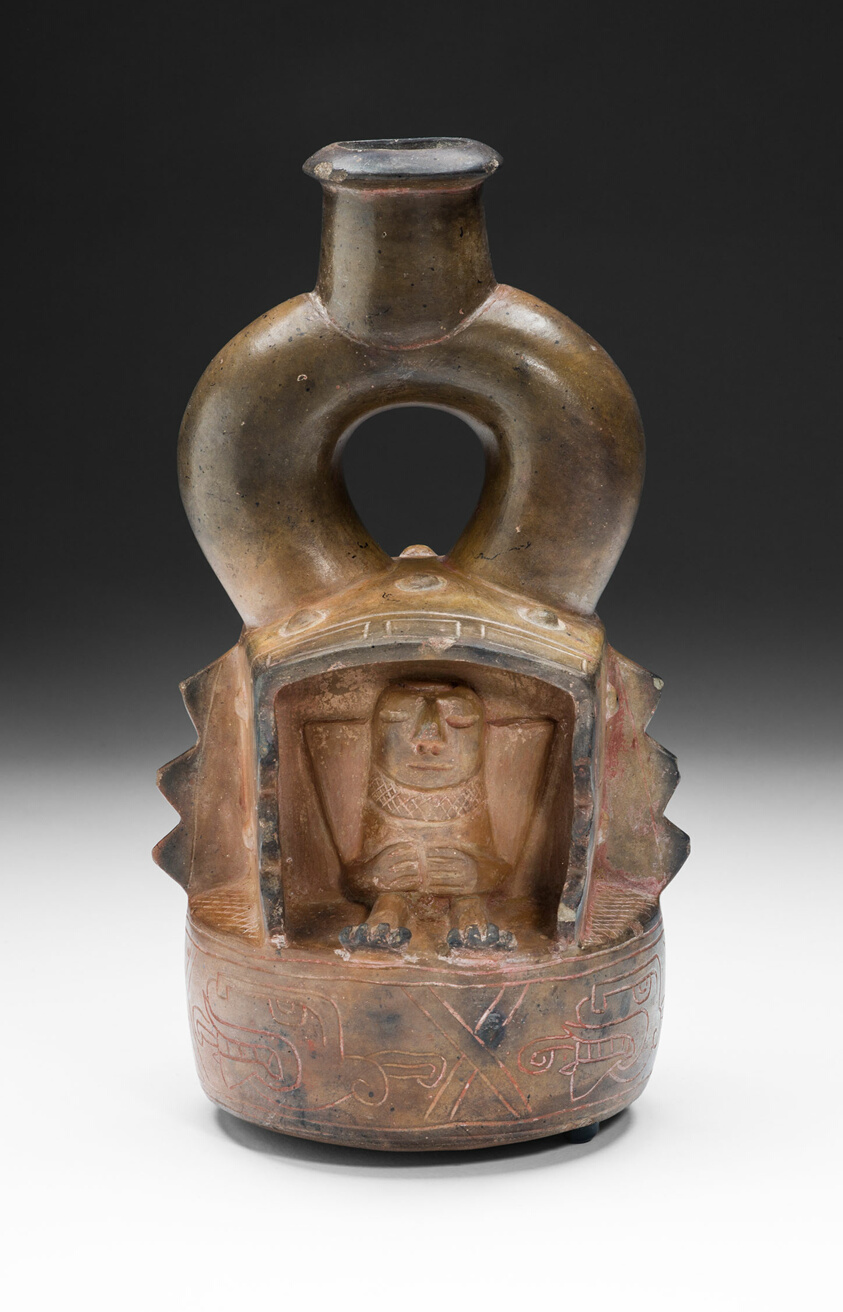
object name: Vessel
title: Vessel with Figure Seated Inside a Structure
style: chavín horizon, early horizon, Pre-Columbian, americas, andes, Arts of the Americas, andean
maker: Chavín (North coast, Peru)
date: c. 800 BCE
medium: Ceramic and pigment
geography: Peruvian North Coast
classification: earthenware; art of the americas; ceramics; vessel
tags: architecture, supernatural, figures (representations), houses, temple